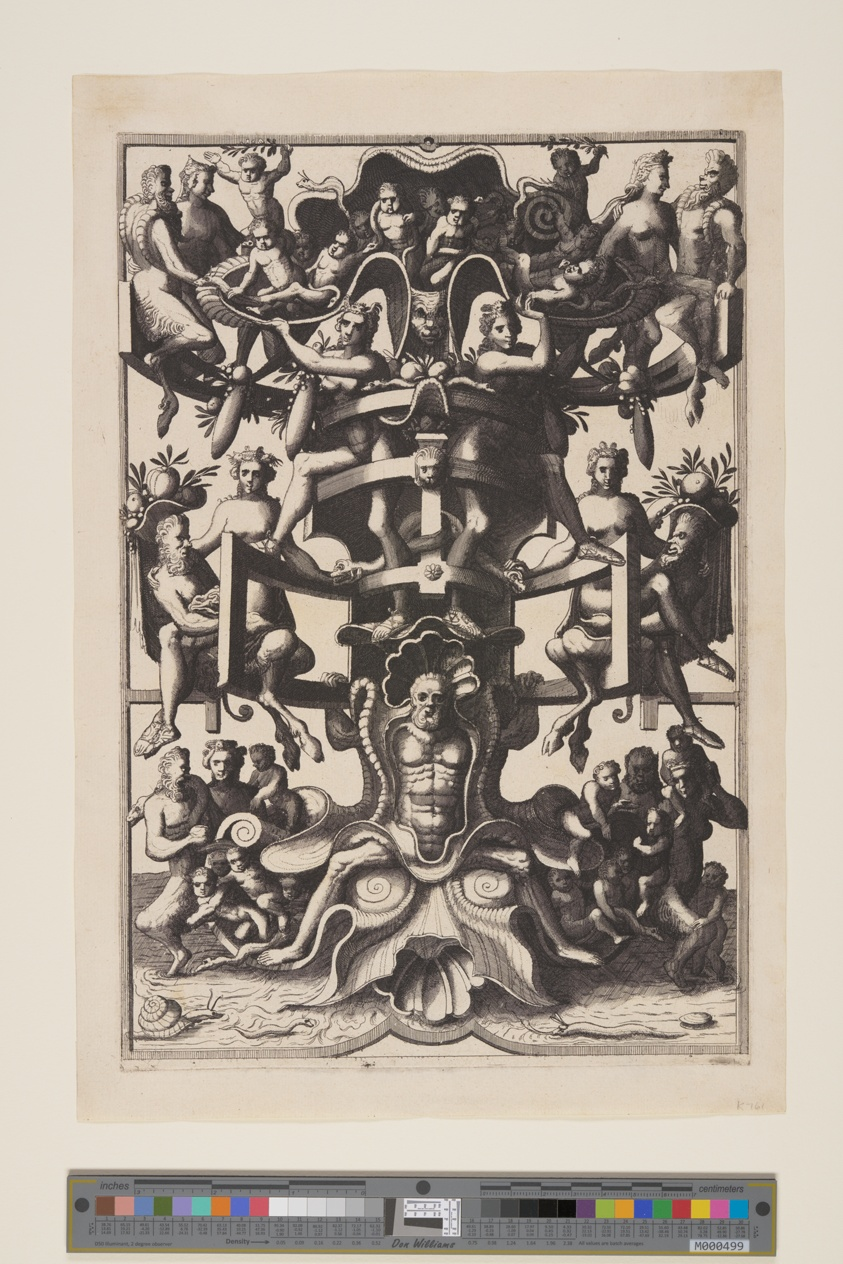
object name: Print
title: Man Sitting on an Auricular Mask, from Veelderleij niewe inventien van antijcksche sepultueren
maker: Johannes van Doetecum (Netherlandish, 1528/32–1605) and Lucas van Doetecum (Dutch, died before 1584); after Cornelis Floris (Flemish, 1514-1575)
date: 1557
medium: Etching on ivory laid paper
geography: Netherlands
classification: print; paper; prints and drawing; etching